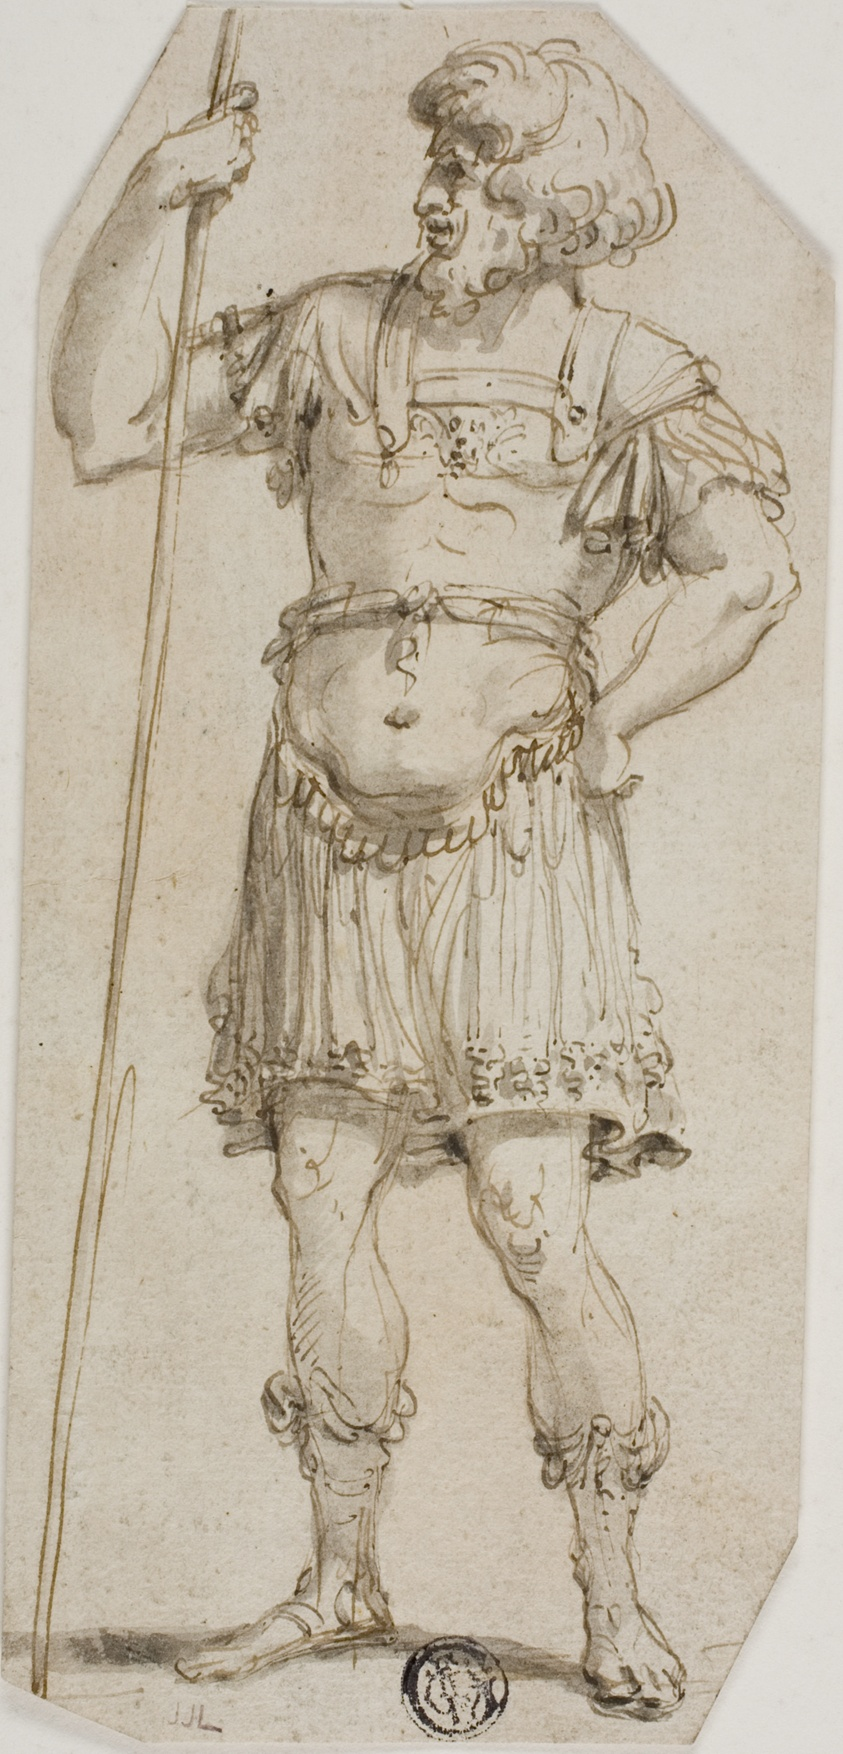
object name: Drawing and Watercolor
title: Standing Roman Warrior Holding Staff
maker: Possibly style of Raymond de Lafage (French, 1656-1690); or possibly Stefano della Bella (Italian, 1610-1664)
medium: Pen and brown ink with brush and gray wash on ivory laid paper, laid down on ivory laid paper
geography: Italy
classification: pen and ink drawings; drawings (visual works); prints and drawing